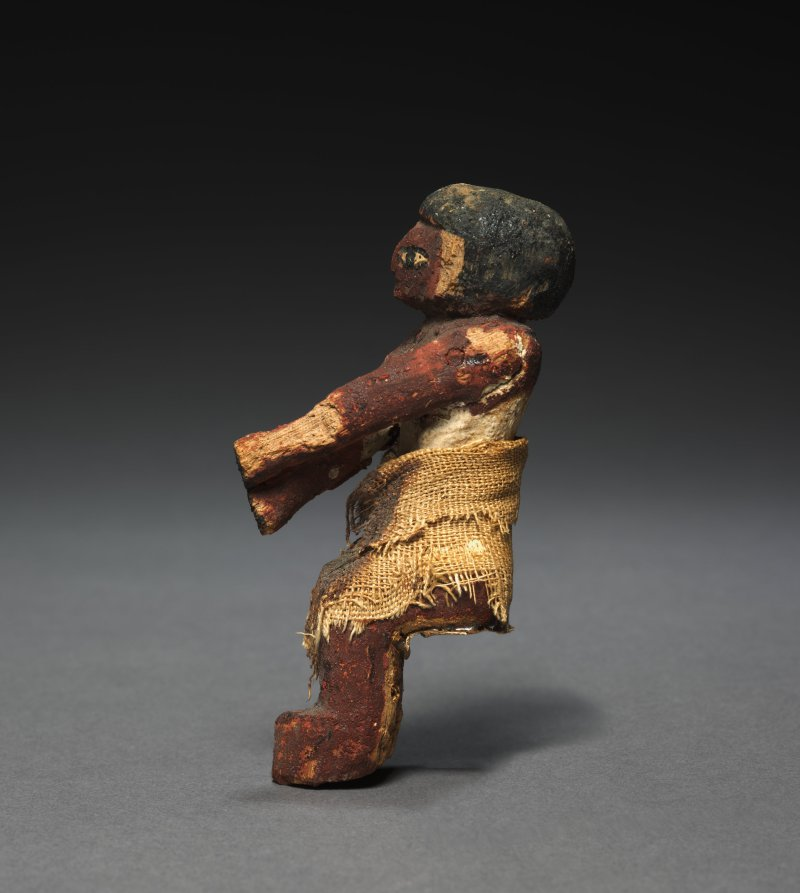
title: Seated Model Sailor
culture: Egypt, Middle Kingdom (2040–1648 BCE), Dynasties 11–12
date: c. 2000–1000 BCE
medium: painted sycamore fig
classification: Funerary Equipment